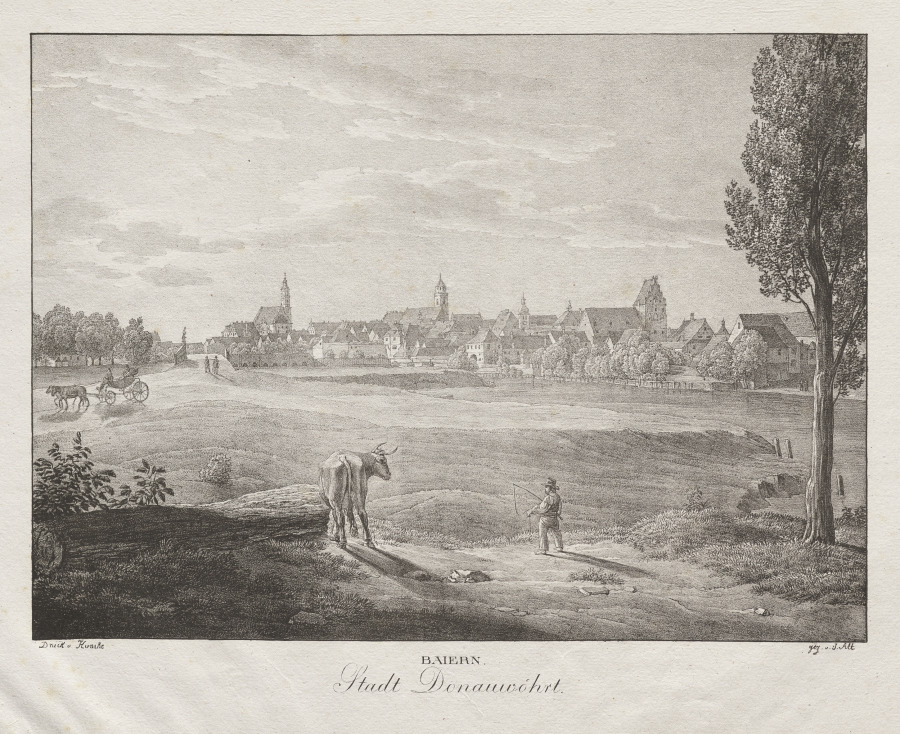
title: Baiern, Stadt Donauwöhrt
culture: Austria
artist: Jakob Alt (Austrian, 1789–1872)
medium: lithograph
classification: Print